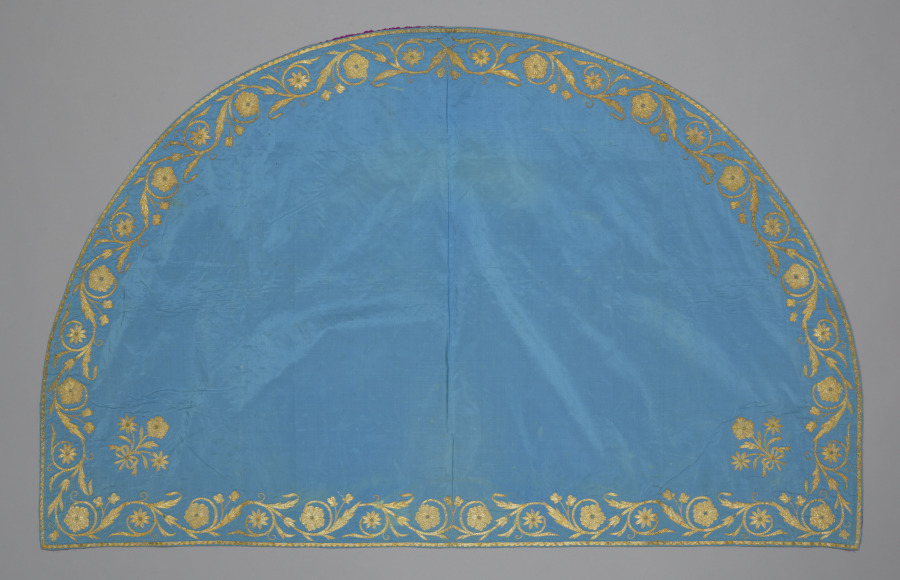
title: Woman's Costume (Head Square)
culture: Italy, Sicily, 19th century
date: 1800s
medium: silk (blue) with metal thread embroidery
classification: Garment